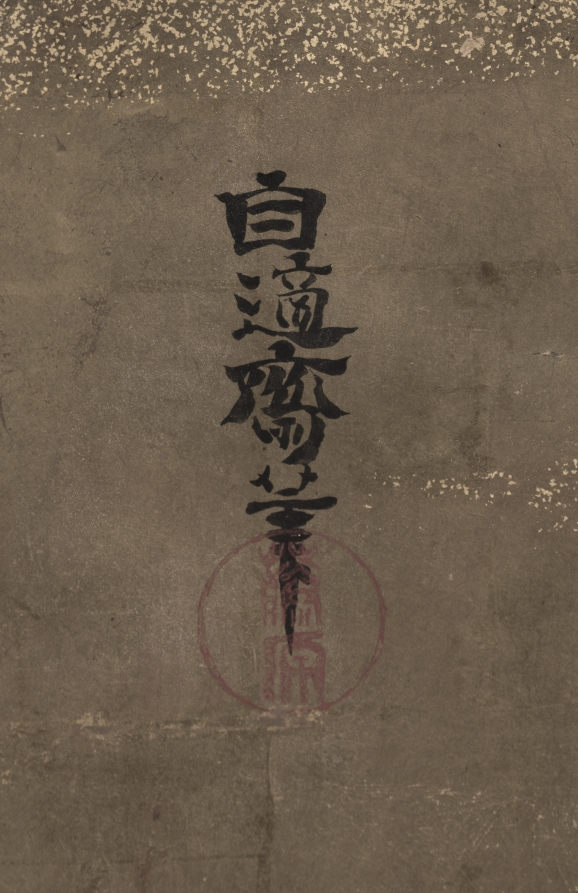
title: Winter Scene with Plum Trees and Pheasants (Birds Right)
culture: Japan, Edo period (1615–1868)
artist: Kano Naonobu (Japanese, 1607–1650)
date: early 1600s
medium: pair of six-fold screens, mineral pigments and gold leaf on paper,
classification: Painting